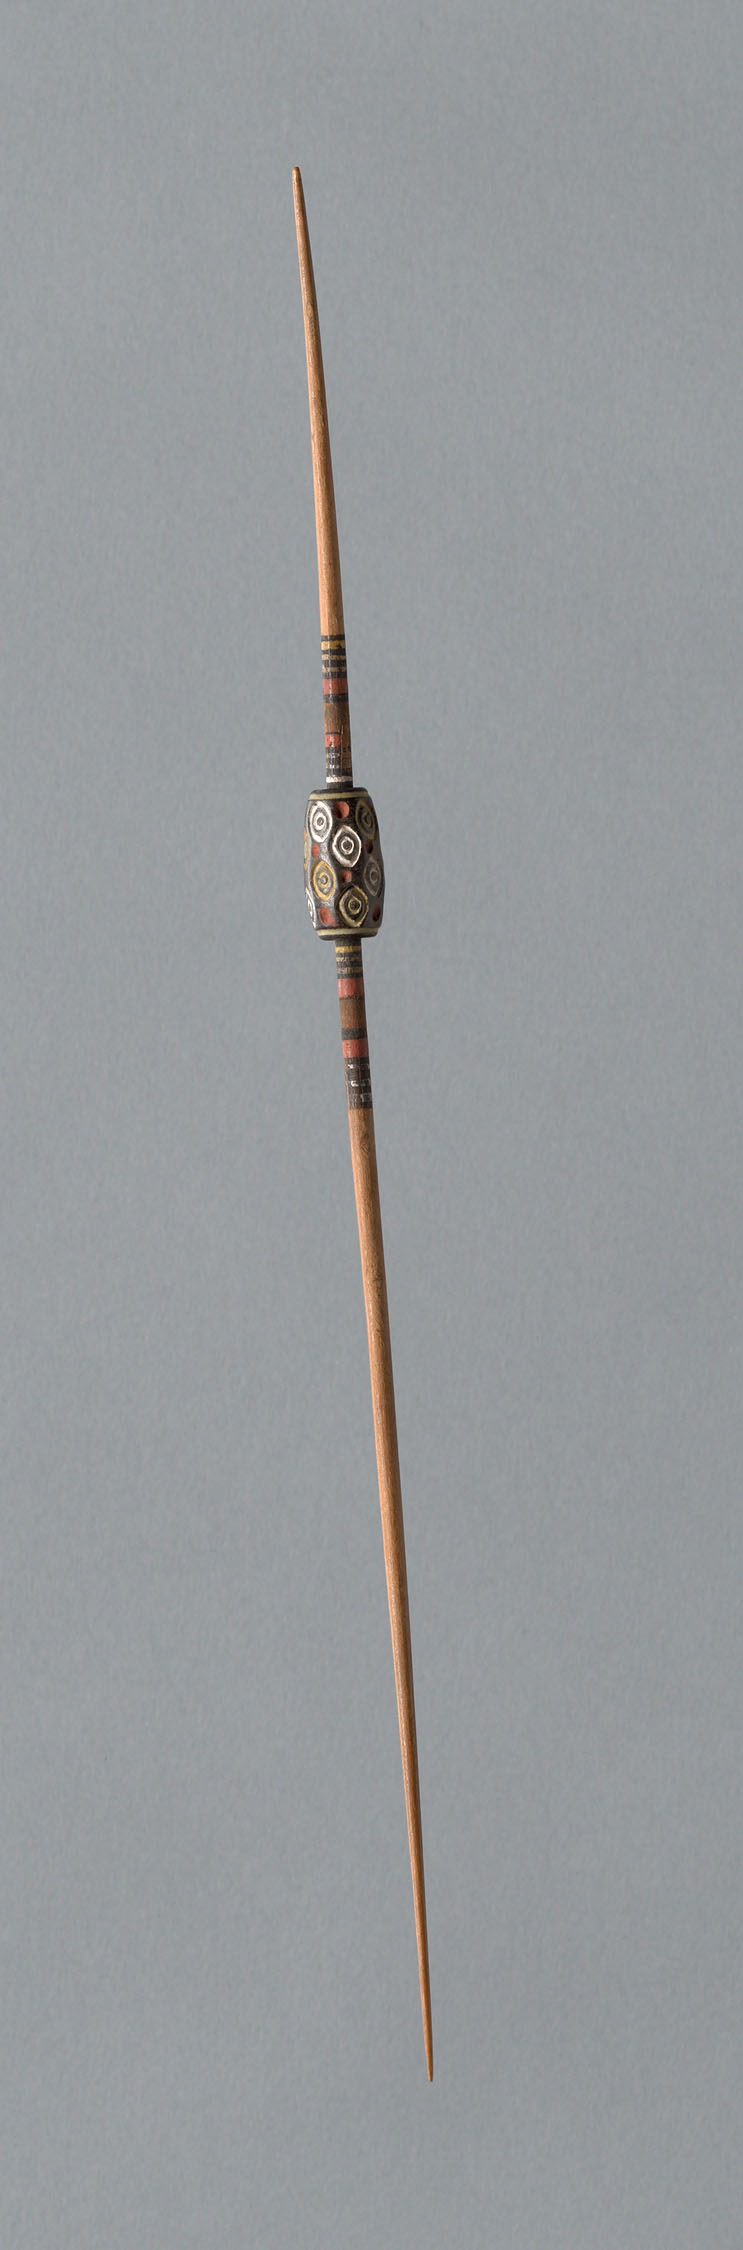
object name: non-art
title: Wooden Spindle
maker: Peru, Possibly central coast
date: 1000/1476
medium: Wood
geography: Peru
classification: spindles (textile working equipment); textile working equipment; accessories (object genre); textile